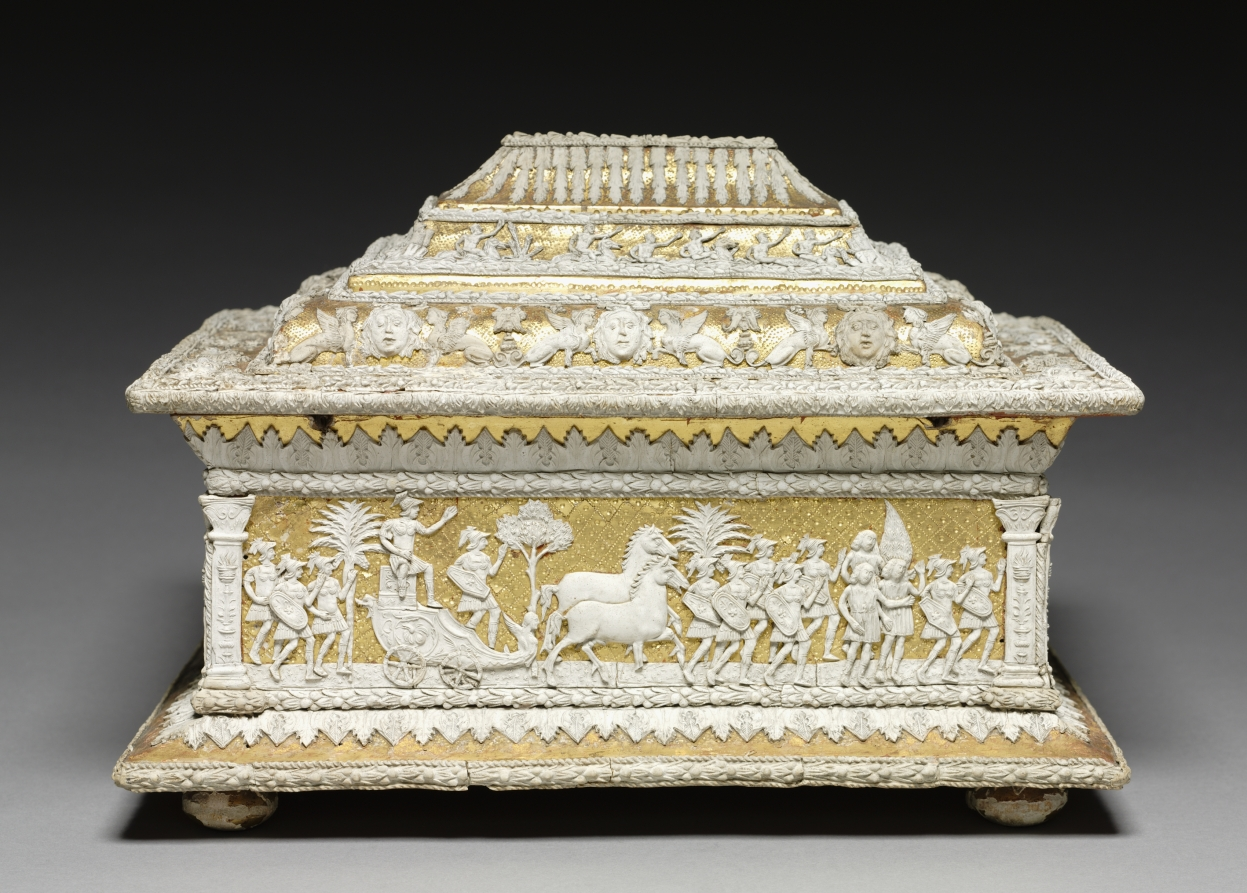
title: Box with Military Scenes from Antiquity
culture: Workshop of the Cleveland Casket (Italy), 16th century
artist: Workshop of the Cleveland Casket (Italian)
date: c. 1520–1530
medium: pastiglia on gilded wood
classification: Furniture and woodwork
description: This box features four military scenes from antiquity: an allegiance, a triumph, a battle, and an execution.